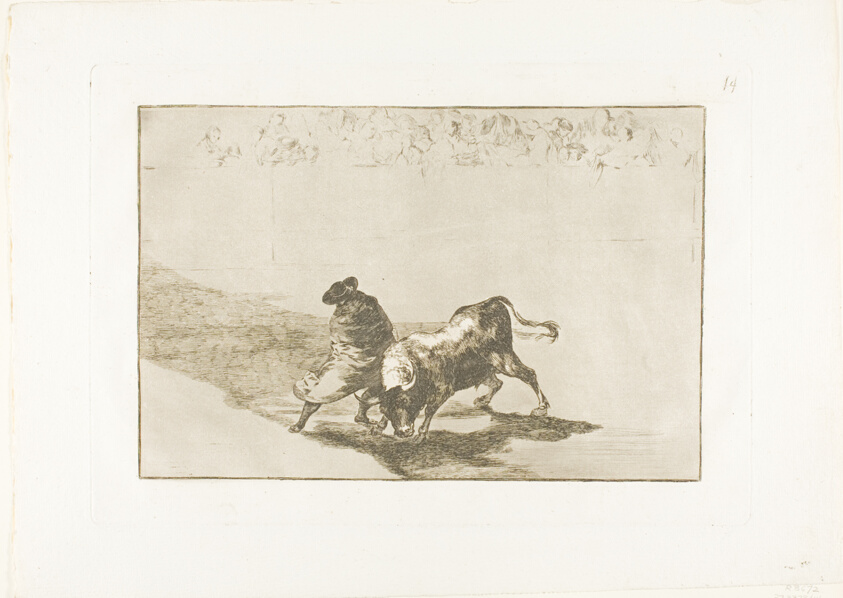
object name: Print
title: The Very Skilful Student of Falces, Wrapped in his Cape, Tricks the Bull with the Play of his Body, plate 14 from The Art of Bullfighting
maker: Francisco José de Goya y Lucientes (Spanish, 1746-1828)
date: 1814/16, published 1816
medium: Etching, aquatint, drypoint and burin on ivory laid paper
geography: Spain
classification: etching; print; prints and drawing